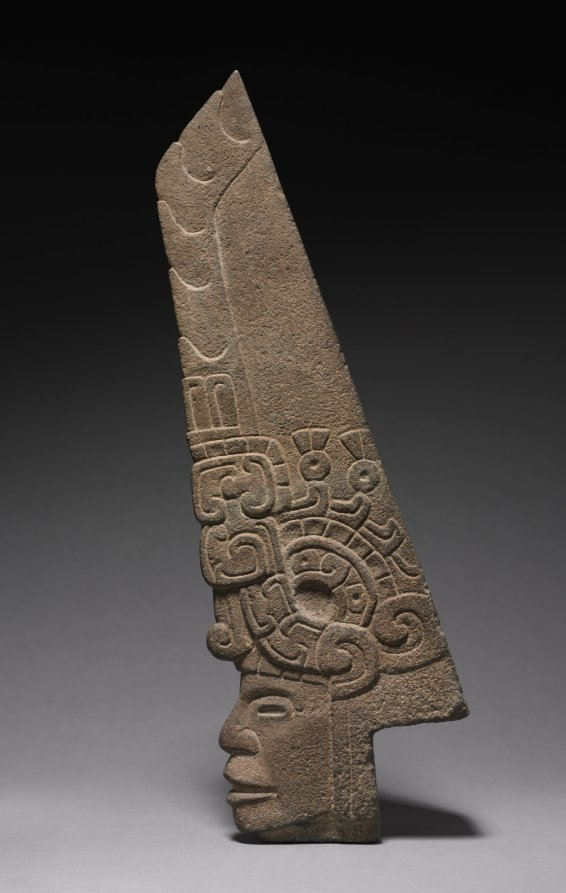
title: Ballgame Thin Stone Head (Hacha)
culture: Mexico, Gulf Coast, Classic Veracruz style (600-1100)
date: 600–900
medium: stone, pigment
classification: Sculpture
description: A tapering headdress, its base formed by a grotesque head with upturned snout, soars above a human face in this elegant thin stone head. Such heads, known as hachas, probably were used in ballgame ceremonies, though how is unclear. Equally obscure are the heads’ identities, perhaps heroic, idealized players, ballgame patrons, or characters from the game’s lore. The large area of red pigment on one side may have been sprinkled onto the head after it was buried in an offering or a tomb.